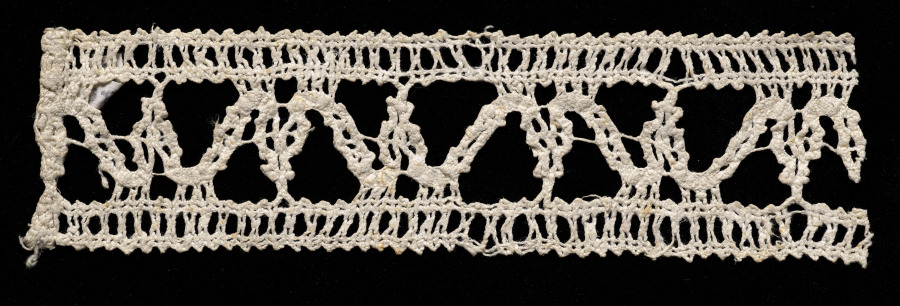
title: Lace Insertion (with selvage)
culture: Italy, Venice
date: 1500s–1600s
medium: Bobbin lace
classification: Lace